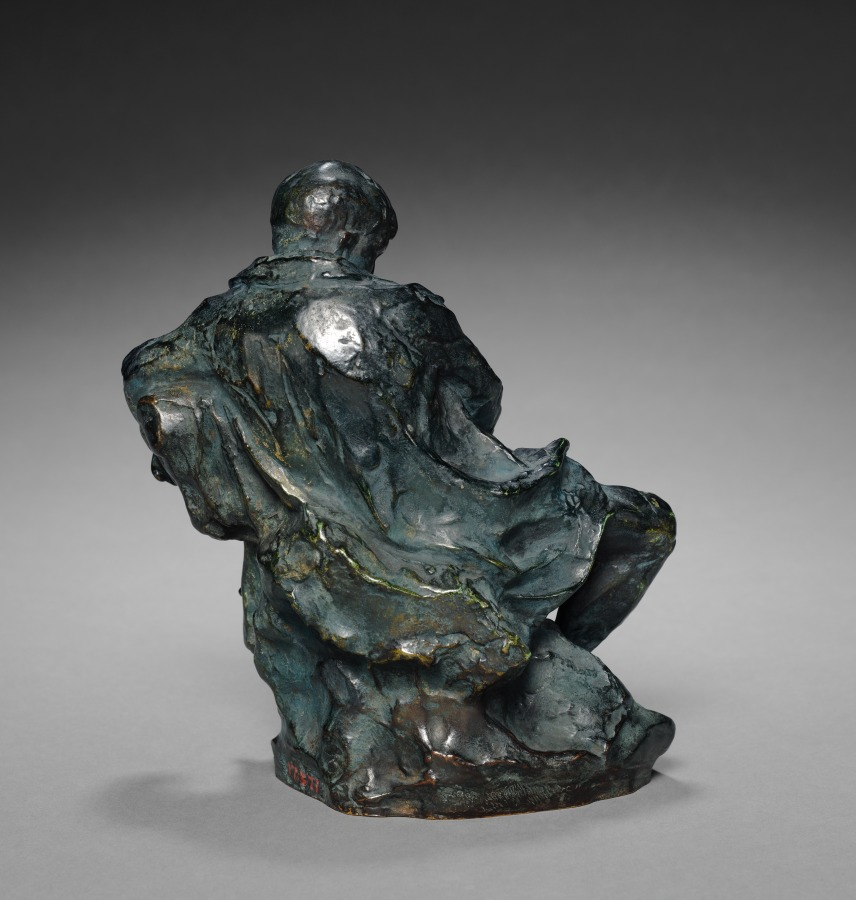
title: Napoleon on St. Helena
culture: France, 19th century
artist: Jean-Baptiste Carpeaux (French, 1827–1875)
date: c. 1860–1870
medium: bronze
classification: Sculpture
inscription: Carpeaux, probably in the wax model, left of Napoleon's foot; on back, an inscription, perhaps the foundry name, has been obliterated with tool marks.